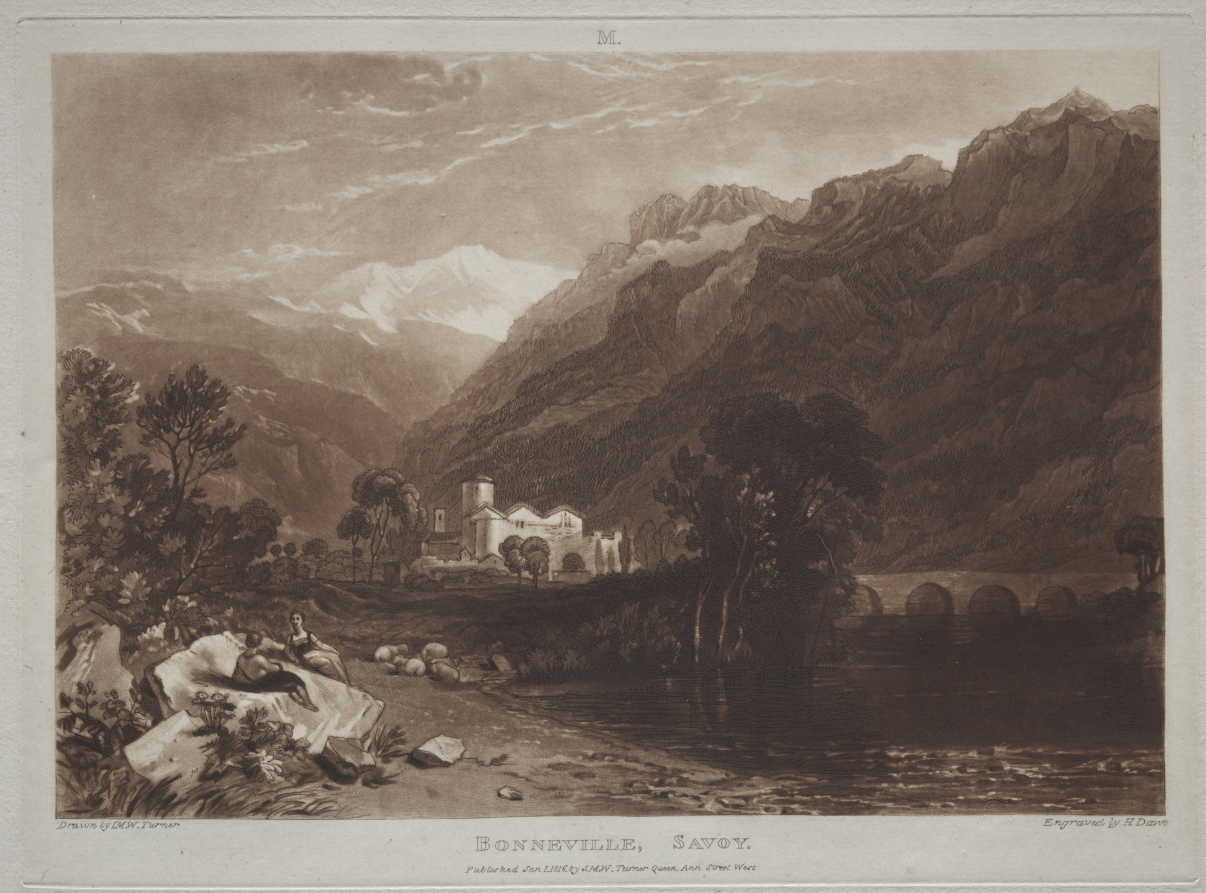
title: Liber Studiorum: Bonneville, Savoy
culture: England, 19th century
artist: Joseph Mallord William Turner (British, 1775–1851)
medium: etching and mezzotint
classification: Print